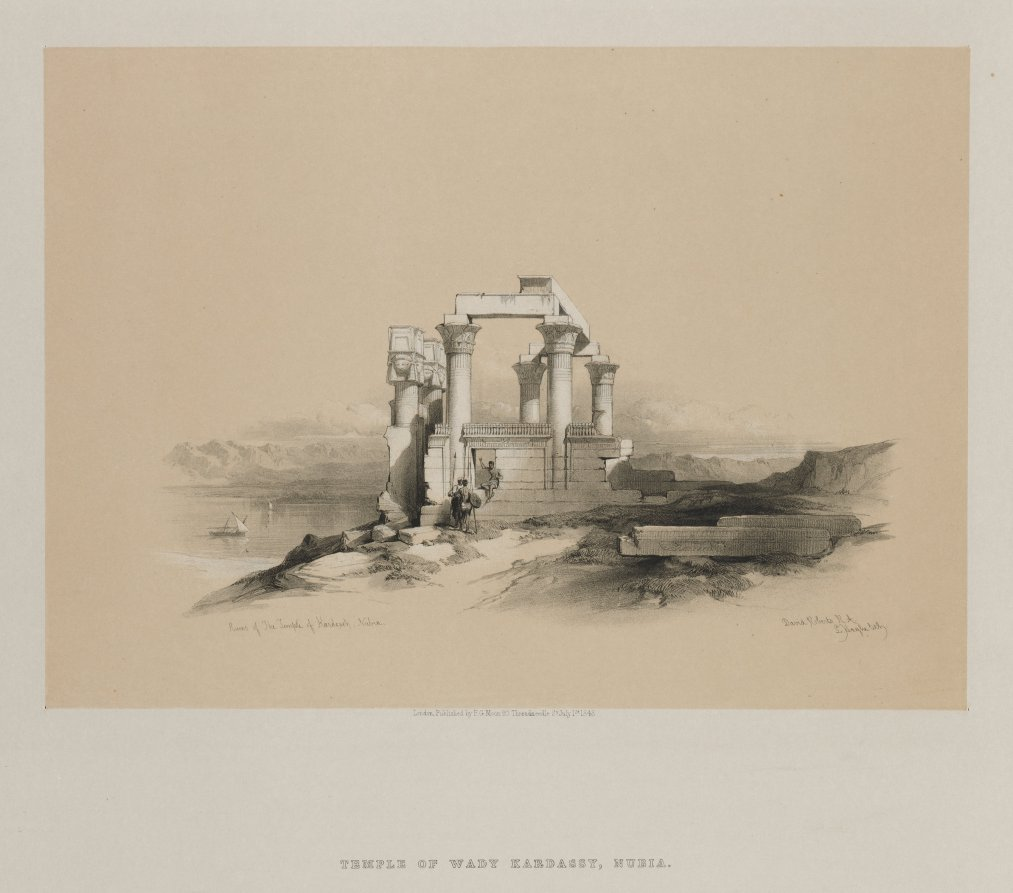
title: Egypt and Nubia, Volume II: Ruins of the Temple of Kardeseh, Nubia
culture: England, 19th century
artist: Louis Haghe (British, 1806–1885)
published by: F. G. Moon, 20 Threadneedle Street, London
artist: after David Roberts (Scottish, 1796–1864)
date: 1848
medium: color lithograph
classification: Print